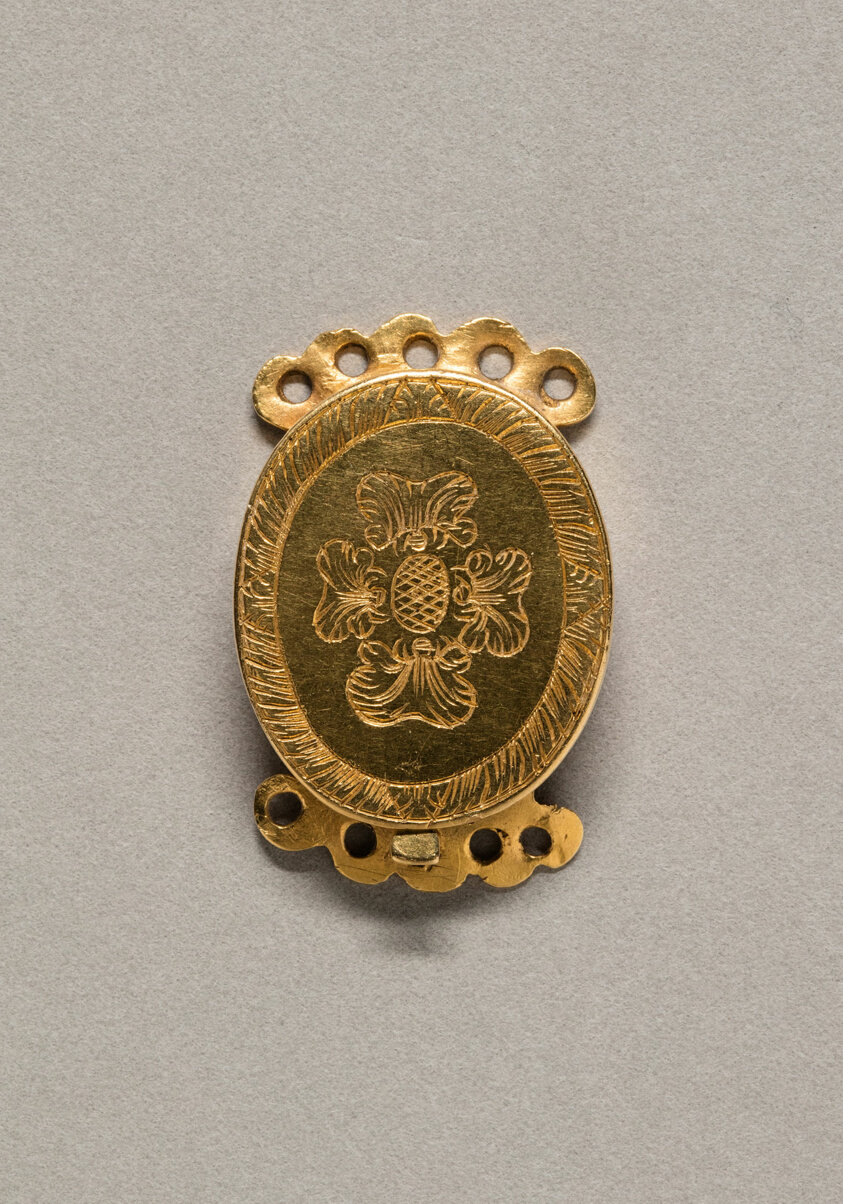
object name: Decorative Arts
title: Locket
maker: Enoch Stanton; American, 1745–1781; Stonington, Connecticut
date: 1766–76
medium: Gold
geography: Connecticut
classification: locket; jewelry; american decorative arts; american arts; decorative arts